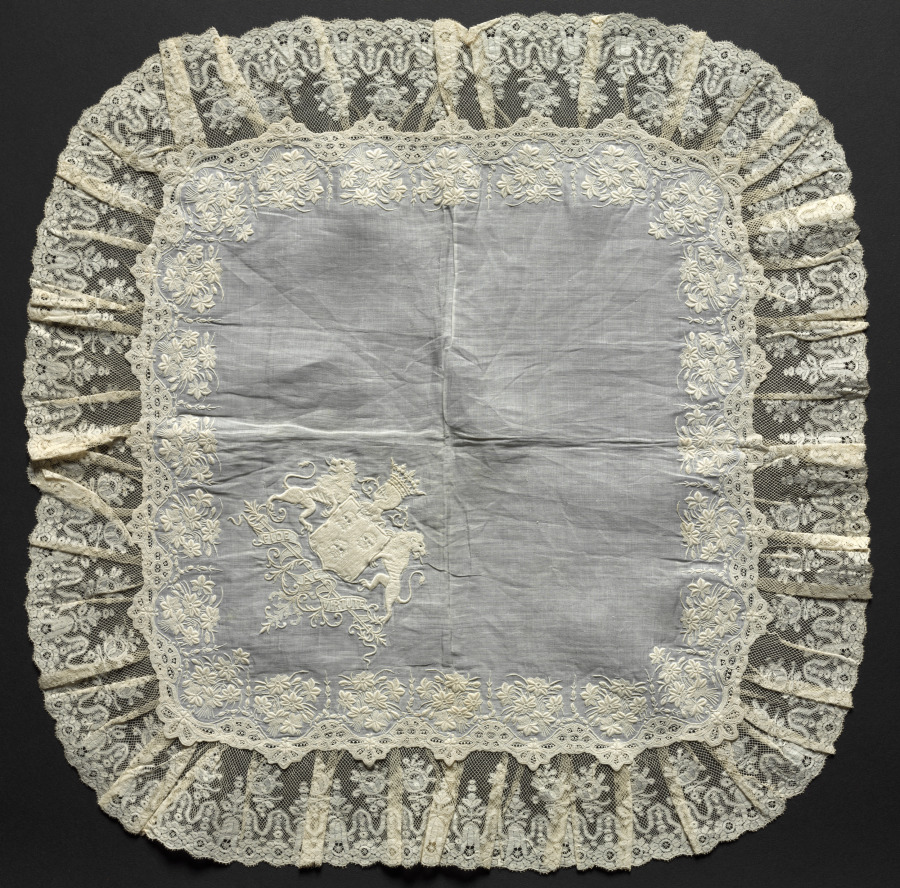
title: Lace Handkerchief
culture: Switzerland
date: 1800s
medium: Plain weave linen center: bobbin lace (Valenciennes lace) edging and embroidery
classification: Embroidery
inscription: crest on one corner with motto: "Fide ac virtute."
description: There is a crest embroidered in one corner of this lace handkerchief, along with the motto "Fide ac virtute" (by faith and virtue).